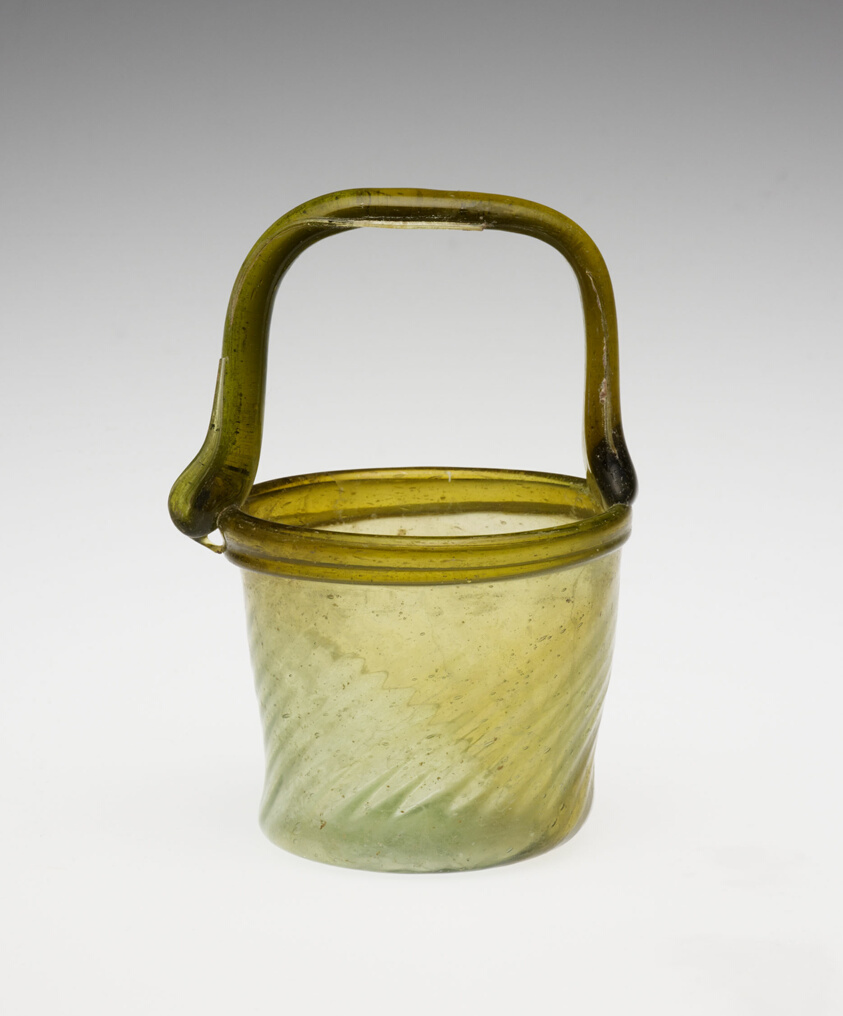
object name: Vessel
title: Jar with Basket Handle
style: syrian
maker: Roman; probably Eastern Mediterranean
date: 3rd-4th century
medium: Glass, mold-blown technique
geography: Syria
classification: vessel; glass; ancient art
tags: containers, basketry